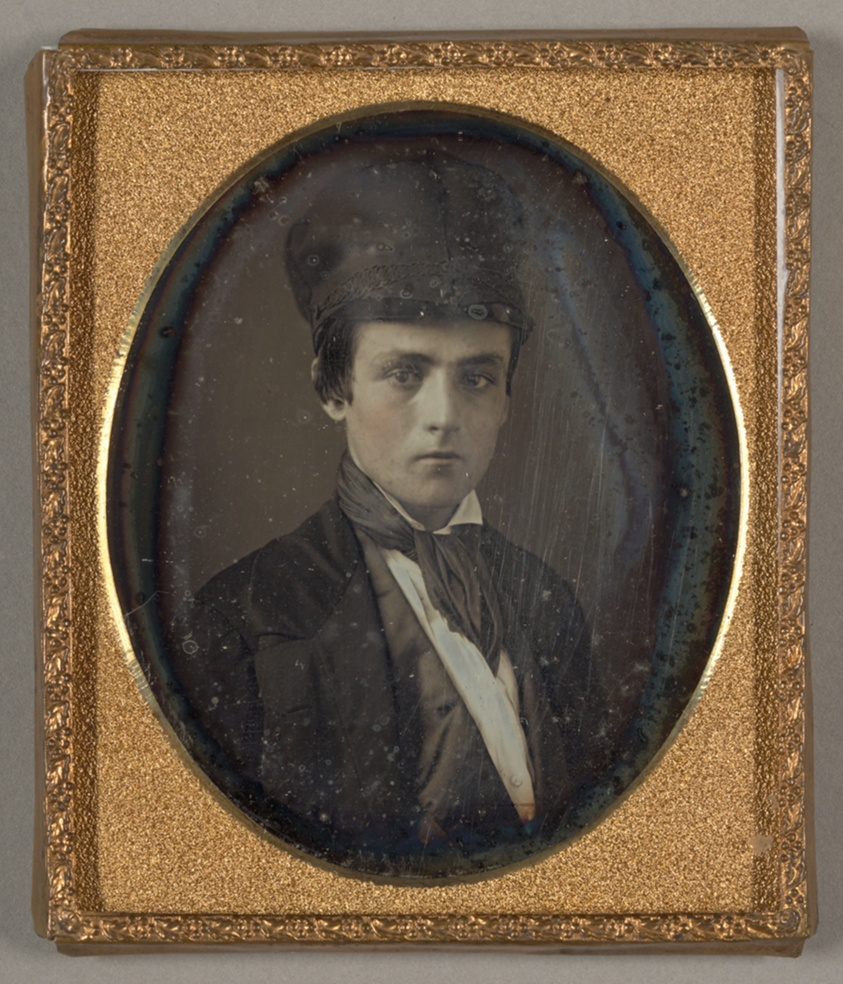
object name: Photograph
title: Untitled (Boy with Hat)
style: 19th century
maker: Artist unknown; 19th century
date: 1839/60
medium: Daguerreotype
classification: photography; photograph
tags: Collected by Hugh Edwards